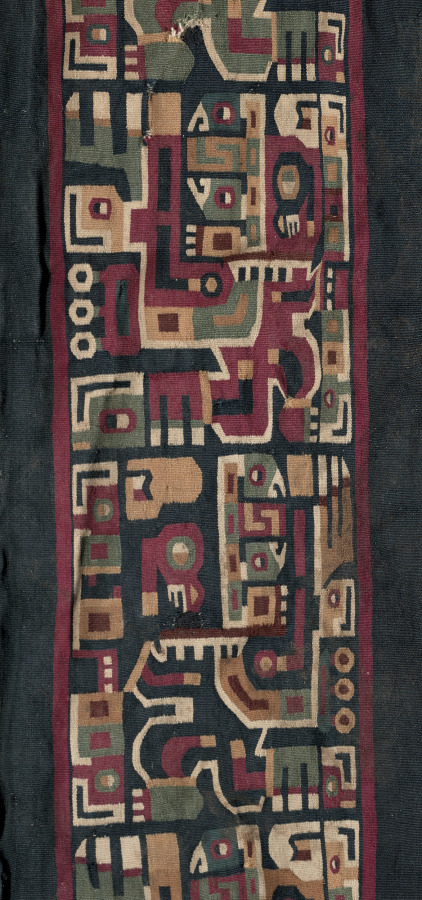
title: Half of a Sleeved Tunic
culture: Central Andes, Middle Horizon, Wari, 6th-11th century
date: c. 500–1000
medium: single-interlocked tapestry; cotton warp; camelid fiber weft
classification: Textile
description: The bird-headed creature in profile that repeats in each of this tunic's design fields gazes upward, holds a staff of authority in front of its body, and wears an ornate headdress behind which a three-feathered wing can be seen. The extremely high technical quality of such tunics suggests that the Wari reserved bird imagery for their most exalted rulers. Here, the original incorporated more than twice as much yarn as the routine--some 19 miles, all handmade and much dyed an inky, dark blue, the most prestigious of Wari colors.